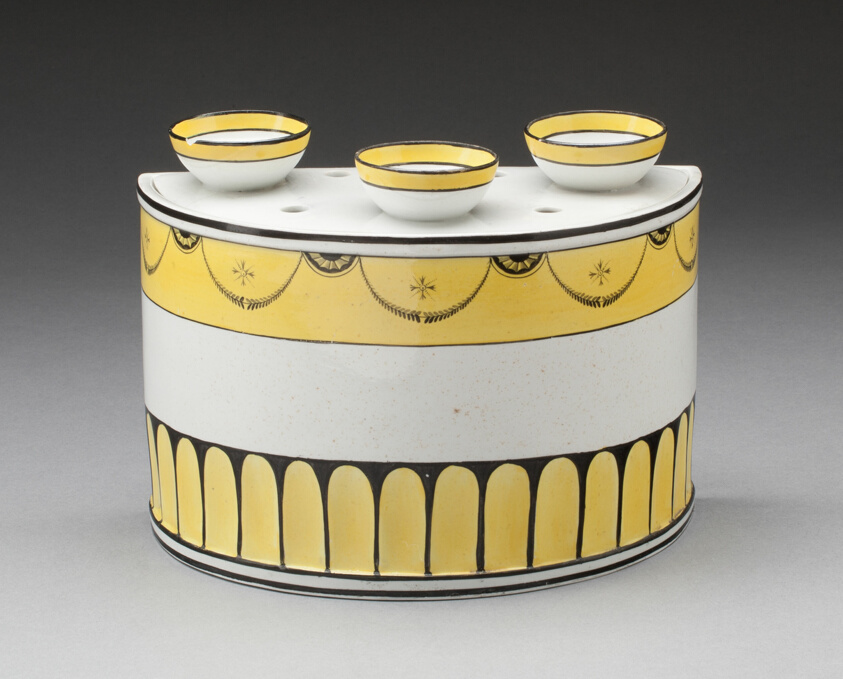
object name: Ceramics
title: Bulb Pot with Cover (one of a pair)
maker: England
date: 18th/19th century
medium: Soft-paste porcelain with polychrome enamels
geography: England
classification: porcelain; european decorative arts; ceramics